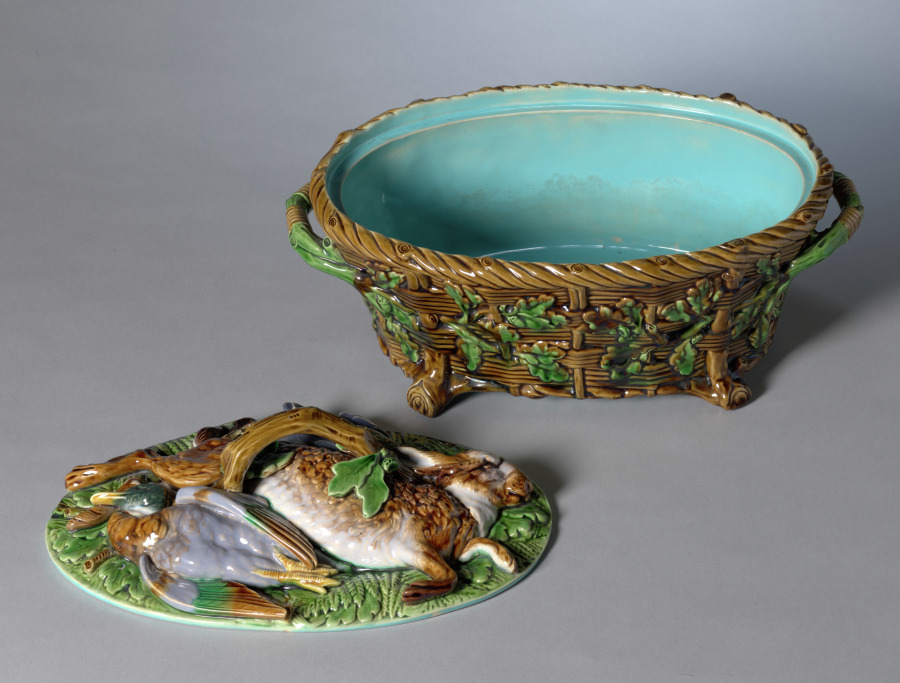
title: Game Pie Dish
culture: England, 19th century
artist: Minton Pottery and Porcelain Factory (British)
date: c. 1860–80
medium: earthenware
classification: Ceramic